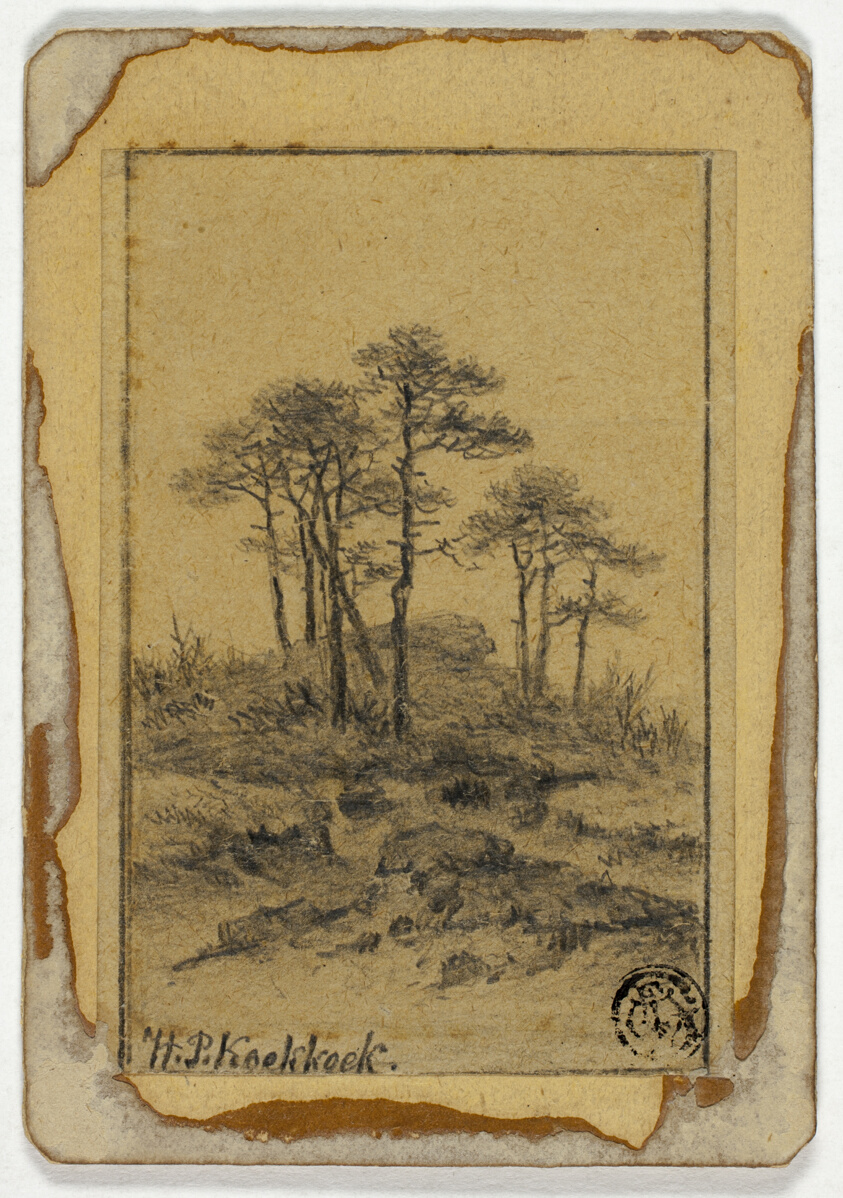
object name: Drawing and Watercolor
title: Trees on Rocky Hill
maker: Hendrik Pieter Koekkoek (Dutch, 1843-c. 1890)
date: c. 1877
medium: Graphite, on tan wove paper, laid down on board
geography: Holland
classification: graphite; drawings (visual works); prints and drawing